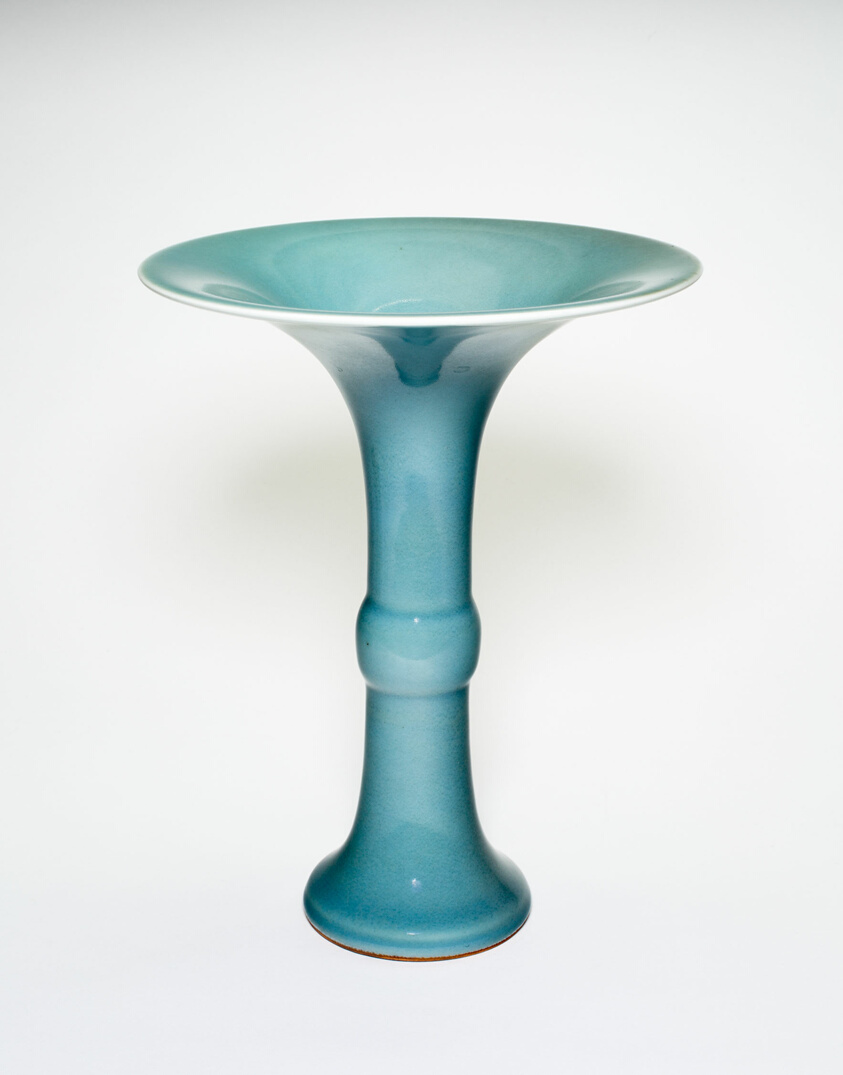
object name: Decorative Arts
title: Gu-Shaped (Archaic Bronze Vessel) Vase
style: Chinese (culture or style)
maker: China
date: Qing dynasty (1644–1911), Yongzheng reign mark and period (1723–1735)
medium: Porcelain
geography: China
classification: vase; porcelain; vessel; asian art; ceramics; decorative arts